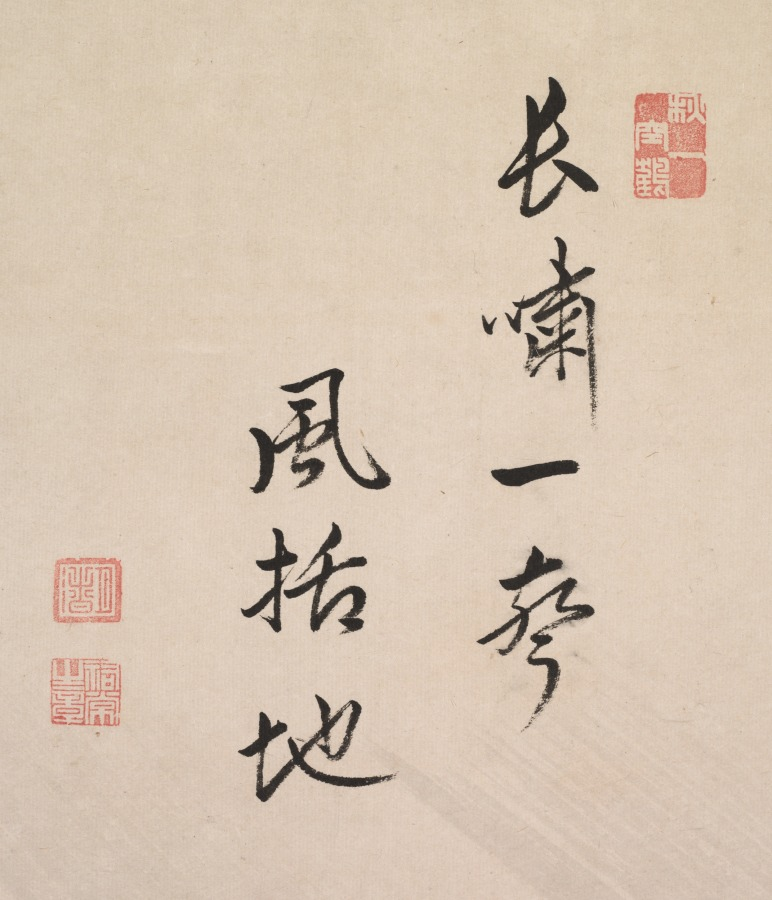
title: Tiger in Wind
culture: Japan, Edo period (1615–1868) to Meiji period (1868–1912)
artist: after Maruyama Ōkyo (Japanese, 1733–1795)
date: 1800s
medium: hanging scroll; ink on paper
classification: Painting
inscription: 「秋空一鶴」賛 長嘯一聲風括地「月渚」朱文方印「祐常之章」白文方印 壬辰初冬寫応挙 「應舉之印」白文方印・「仲選」白文方印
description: The seals appended to the inscription on this painting suggest that the text was brushed by Yūjō (1723–1773), an imperial prince who became a Buddhist monk and was abbot of Enman'in at Miidera. The line is from a poem attributed to a Yuan dynasty poet, Yu Ruyu (dates unknown), and describes the sound of a fierce wind lashing the ground. Wind is associated with the roar of the tiger. Yūjō was Maruyama Ōkyo's most important patron as a young artist, and this painting has a signature asserting that Ōkyo created it in 1772, the year before Yūjō's death. While Yūjō produced a preface for a now famous set of handscrolls he commissioned Ōkyo to paint, and a number of Ōkyo's compositions for Enman'in survive, this work would appear to be one imagining their relationship, as opposed to a genuine piece.